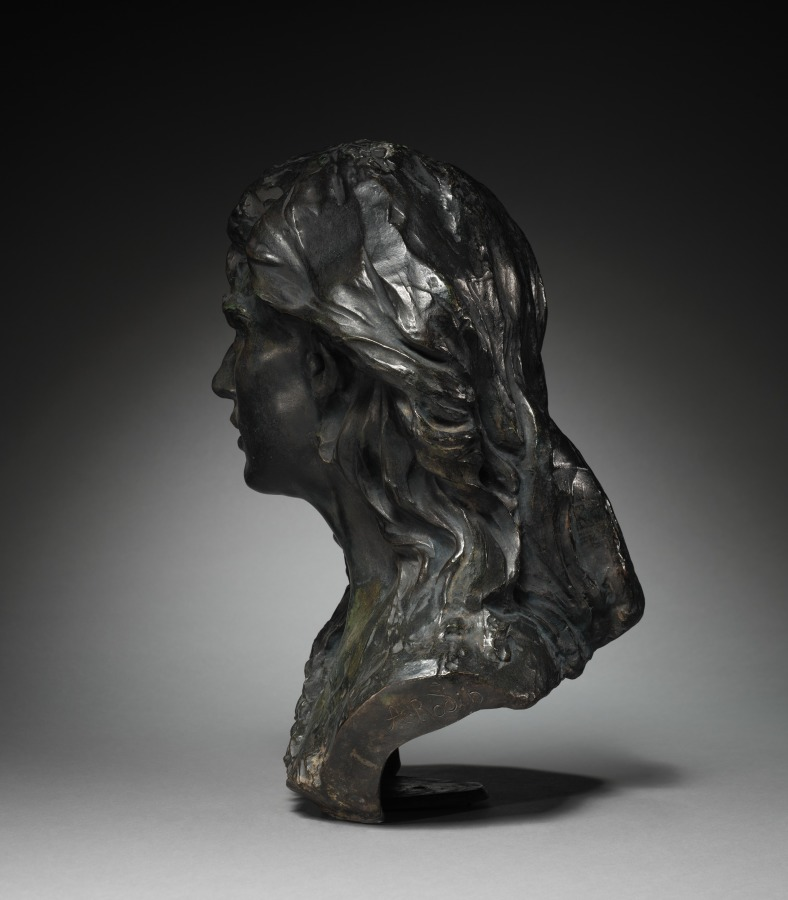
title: Mignon: Bust of Rose Beuret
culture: France, late 19th-early 20th century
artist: Auguste Rodin (French, 1840–1917)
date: c. 1867–1868 (original model)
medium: bronze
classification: Sculpture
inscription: Signed on shoulder to right: "A. Rodin"